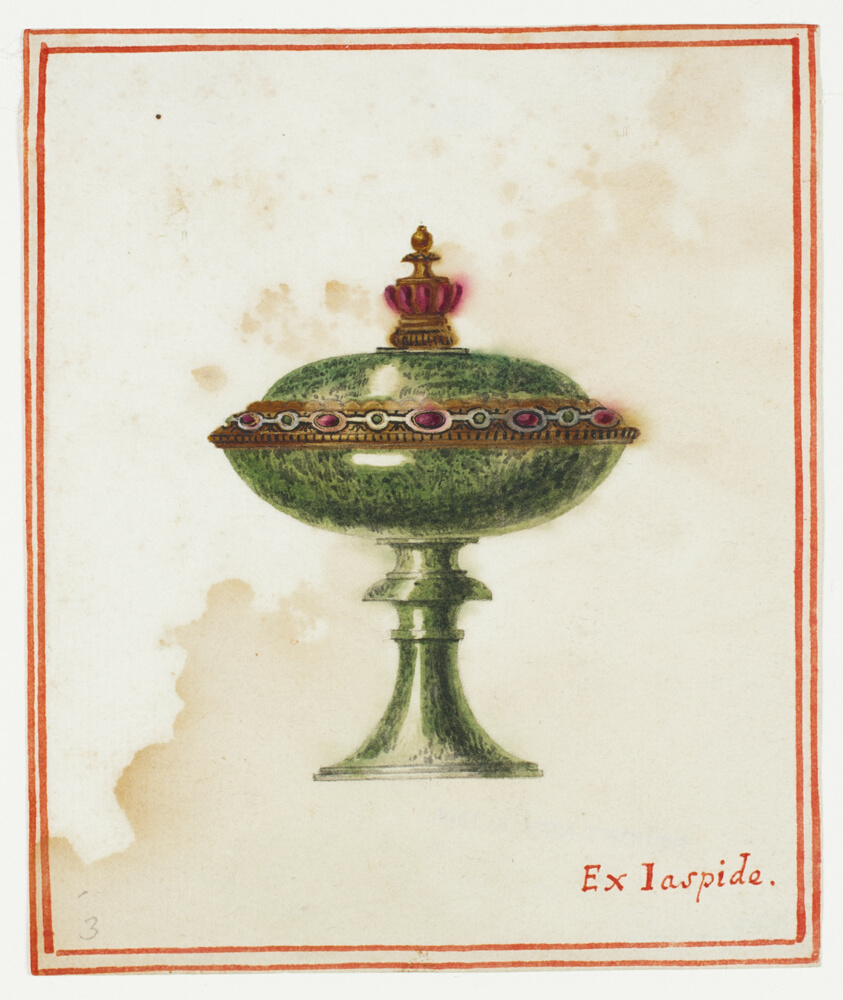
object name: Drawing and Watercolor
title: Jasper Covered Dish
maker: Giuseppe Grisoni (Italian, born Flanders, 1699-1769)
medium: Gouache, heightened with touches of gold paint, over black chalk, on ivory laid paper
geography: Flanders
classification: gouache; watercolor; drawings (visual works); prints and drawing